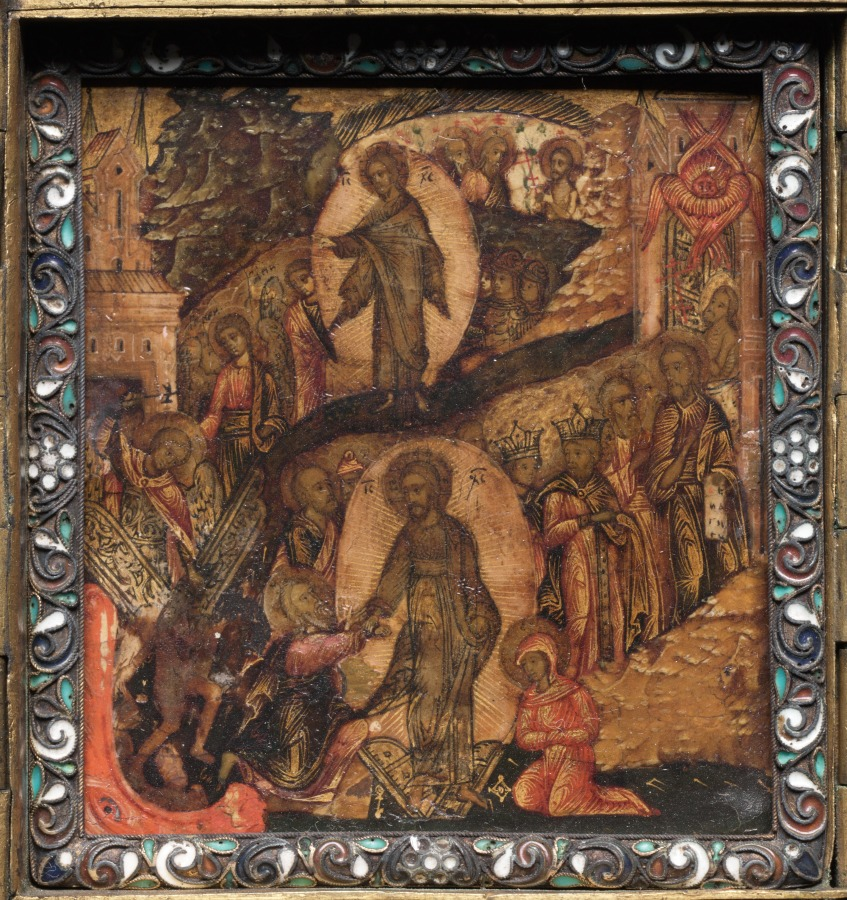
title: Portable Triptych Icon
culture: Byzantium, Russia, Moscow?, Byzantine period, 17th century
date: 1600s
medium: painted wood panel within enameled brass frame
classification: Painting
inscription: Inscribed throughout in traditional Church Russian (Church Slavonic) with names of prophets, saints, etc. Engraved on the outside of the brass frame is a cross with the symbols of the Passion, inscribed (top to bottom): The King of Glory; Jesus Christ; Victor; Lance (with which Christ was speared); Stick (tipped with acid to aggravate the wound); the initials R, B, M, L, G, G, standing for various personages represented in the paintings; and at the lower center, the Russian letters GA ("Golova Adama": Head of Adam). A scrap of paper was found behind the center panel, but it is damaged and very difficult to read. Professor A. Dean McKenzie of the University of Oregon, who translated the numerous inscriptions and identified the iconography of the panels, likewise examined the writing on the paper scrap and in a letter of January 29, 1979, said that it refers to two brothers: Ivan Dmitrievich, one of the brothers, apparently presented this icon as a gift to his younger brother.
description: This triptych icon was probably commissioned by a lay person for private prayer and meditation. It could be folded and shut when not in use. The scenes represented from left to right are: The Crucifixion (left); The Resurrection and Anastasis (center); and Adoration of the Miracle-Working Icon of the Vladimir Mother of God (right). Small portable icons such as this were common to later Russian religious practice.